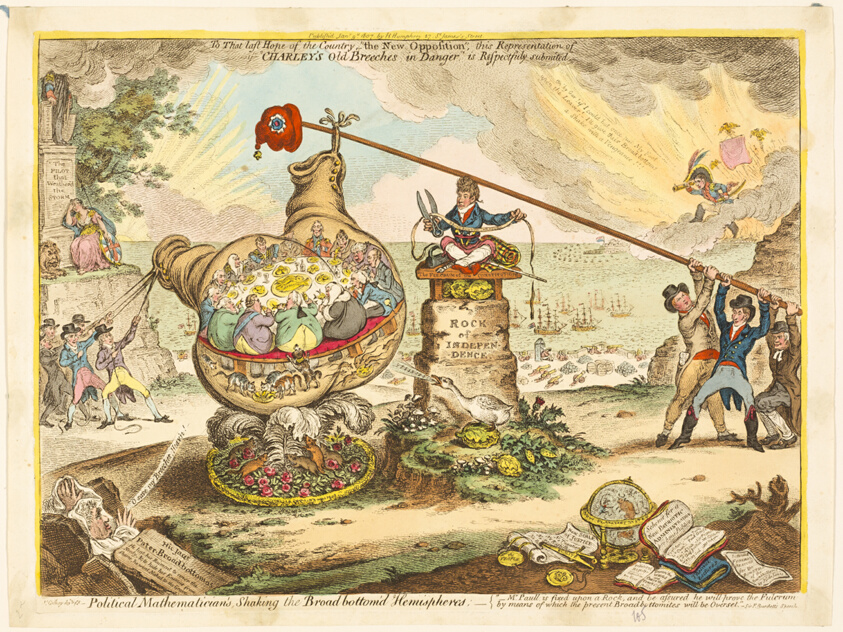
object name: Print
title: Political Mathematician's, Shaking the Broad Bottom'd Hemispheres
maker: James Gillray (English, 1756-1815); published by Hannah Humphrey (English, c. 1745-1818)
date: published January 9, 1807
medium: Hand-colored etching on paper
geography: England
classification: etching; print; prints and drawing